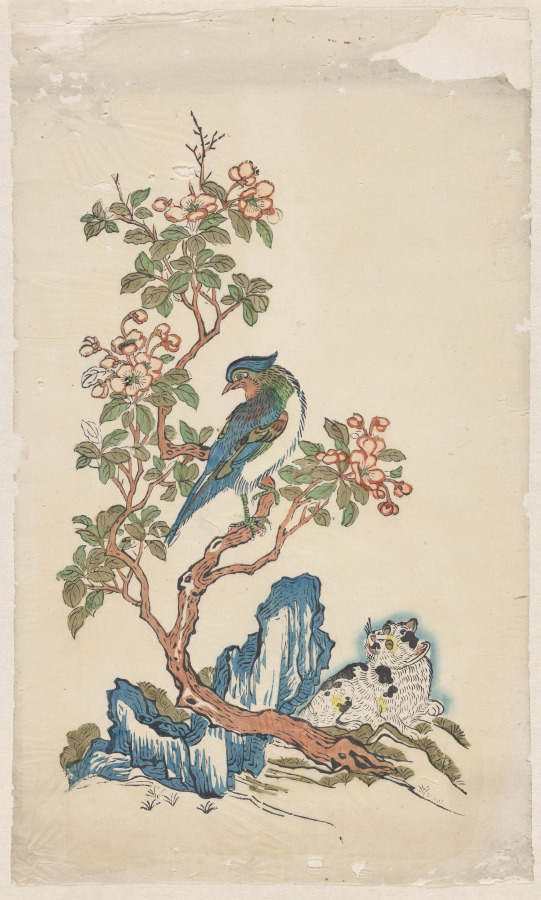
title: Picture of a Cat, a Bird, and a Crabapple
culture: China, Qing dynasty (1644–1911), Kangxi reign (1622–1722) to Yongzheng reign (1723–35)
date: 1662–1735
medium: Polychrome woodblock print; ink and color on paper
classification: Print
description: In the 1600s, printing flourished in such Jiangnan cities as Nanjing, Suzhou, Hangzhou, and Huizhou, evolving from privately enjoyed illustrated books printed in color to more commercialized single-sheet color prints that were hung on walls and became part of the rich urban visual culture.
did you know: Woodblock printing in color reached a height in China in the 1600s to 1700s. The prints were executed by means of sets of separate blocks, each carved to print a different color.